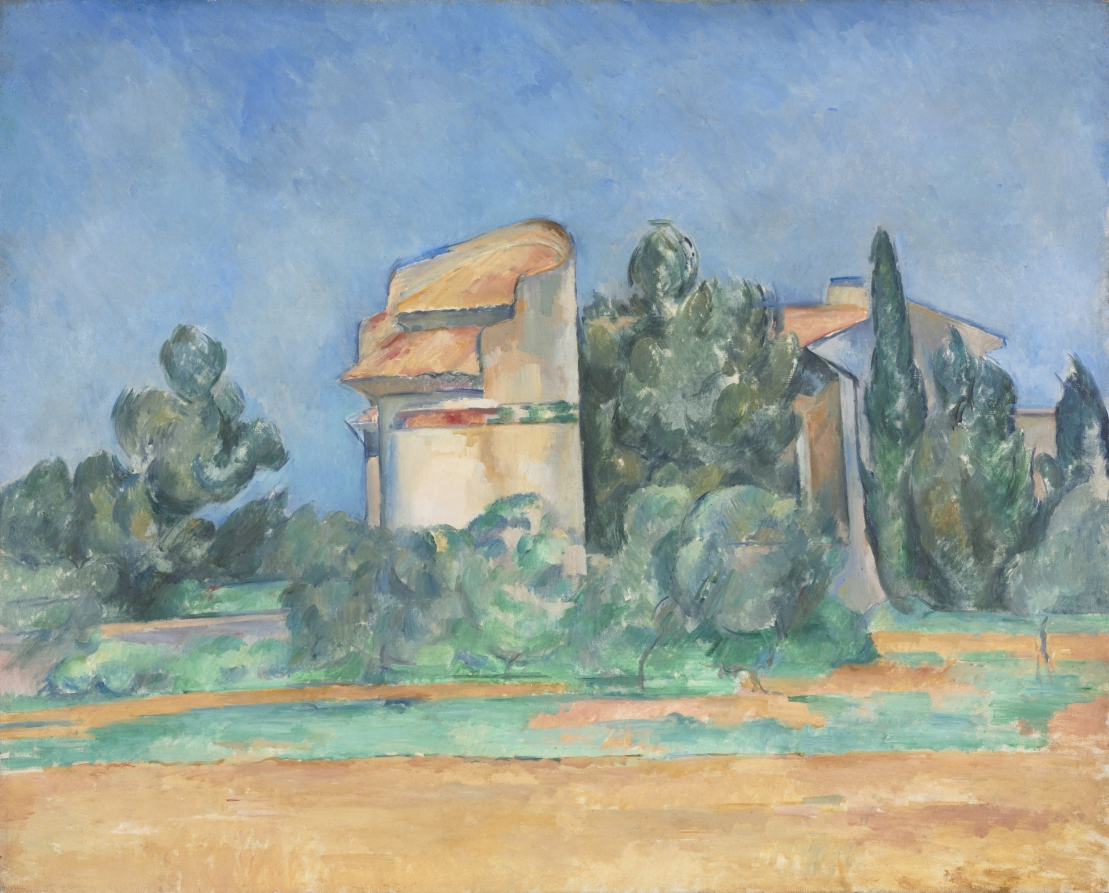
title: The Pigeon Tower at Bellevue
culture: France, 19th century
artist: Paul Cezanne (French, 1839–1906)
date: 1890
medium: oil on fabric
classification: Painting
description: Paul Cezanne painted this composition in three horizontal planes: the azure blue of the sky; the luminous white of the tower and the farmyard buildings; and the burnt-orange shade of the foreground earth, whose color is indicative of the iron-rich soil of Provence. The shimmering greens of Cezanne’s favorite cypress and olive trees are interspersed across the middle ground. The composition is pared down to its essentials, devoid of extraneous detail; it exemplifies his ambition “to make something solid and enduring, like the art in museums.”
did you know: Cézanne’s method of compressing space and simplifying forms into flattened, geometric shapes provided the foundation for both Fauvism and Cubism.